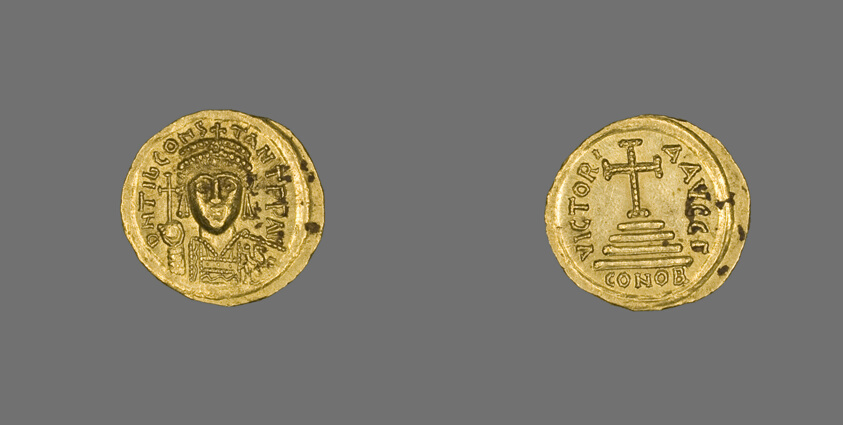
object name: Coin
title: Solidus (Coin) of Tiberius II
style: byzantine, european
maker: Byzantine, minted in Constantinople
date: 574–582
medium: Gold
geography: Byzantine Empire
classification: coin; ancient art